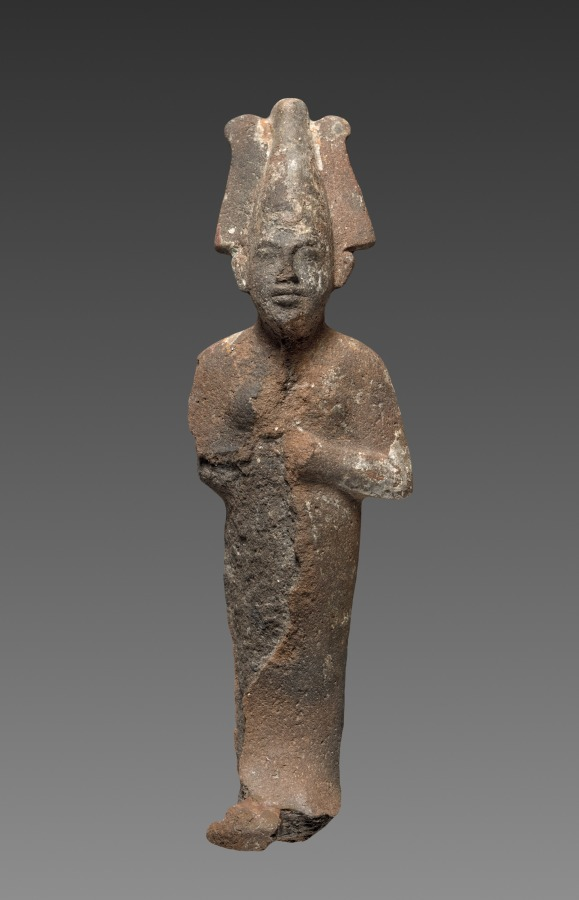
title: Statuette of Osiris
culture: Egypt, New Kingdom (1540–1069 BCE), Dynasties 19–20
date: 1295–1069 BCE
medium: painted terracotta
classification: Funerary Equipment